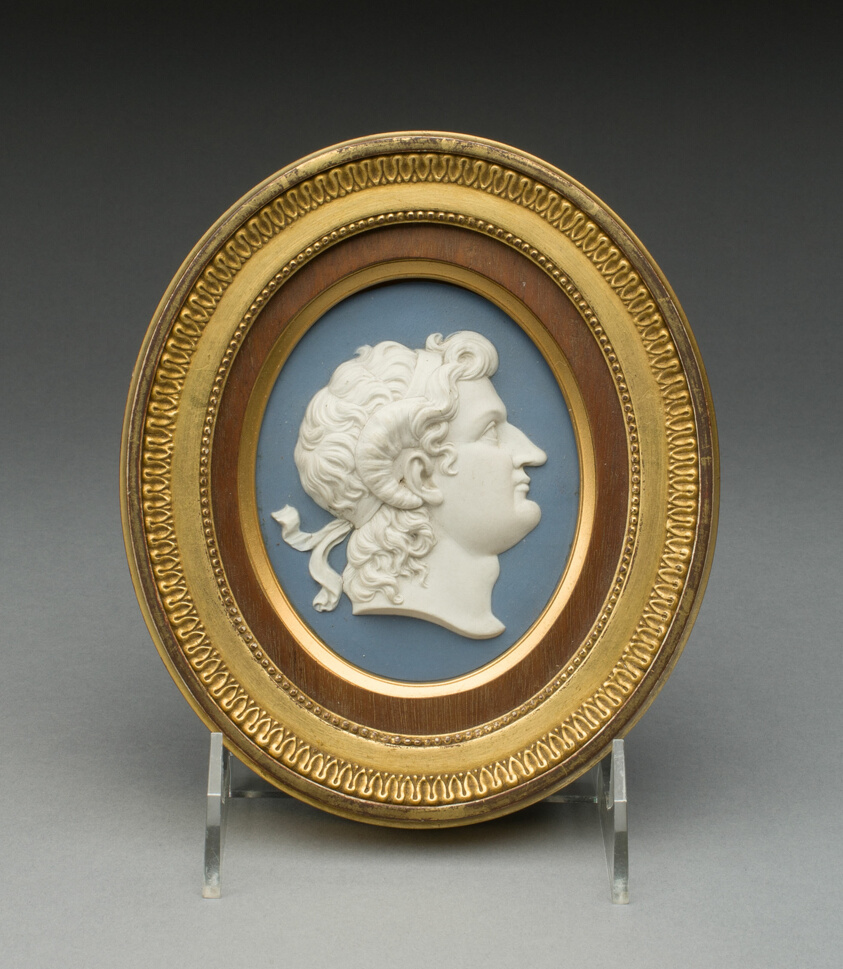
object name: Ceramics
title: Plaque with Alexander the Great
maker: Wedgwood Manufactory (England, founded 1759)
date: 1775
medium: Stoneware (jasperware)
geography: Burslem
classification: sculpture; stoneware; european decorative arts; ceramics